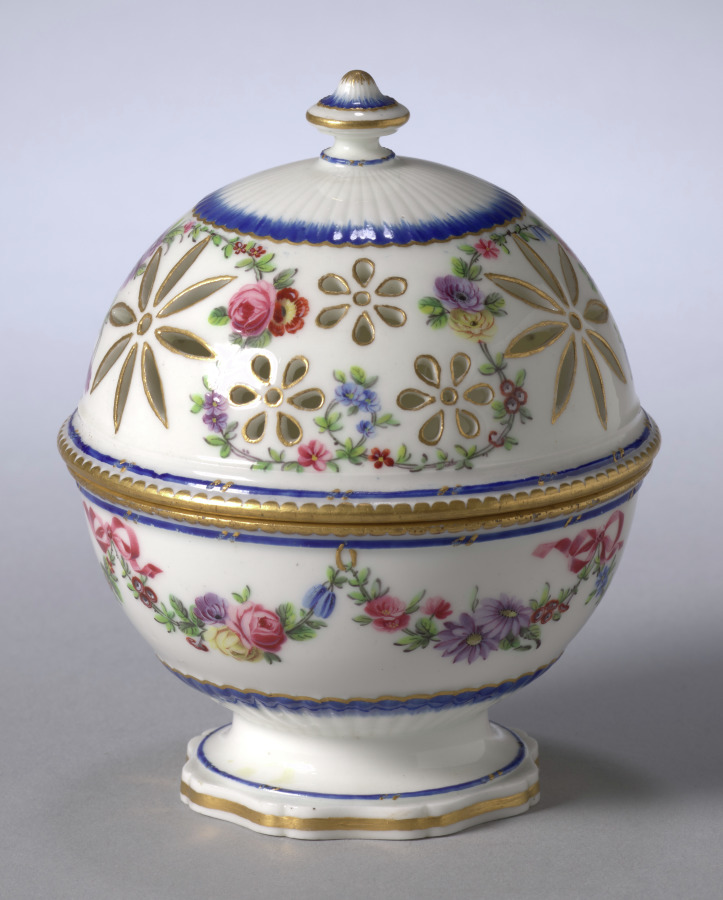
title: Sponge Box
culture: France, Sèvres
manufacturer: Sèvres Porcelain Factory (French, est. 1756)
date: c. 1769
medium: soft-paste porcelain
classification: Ceramic